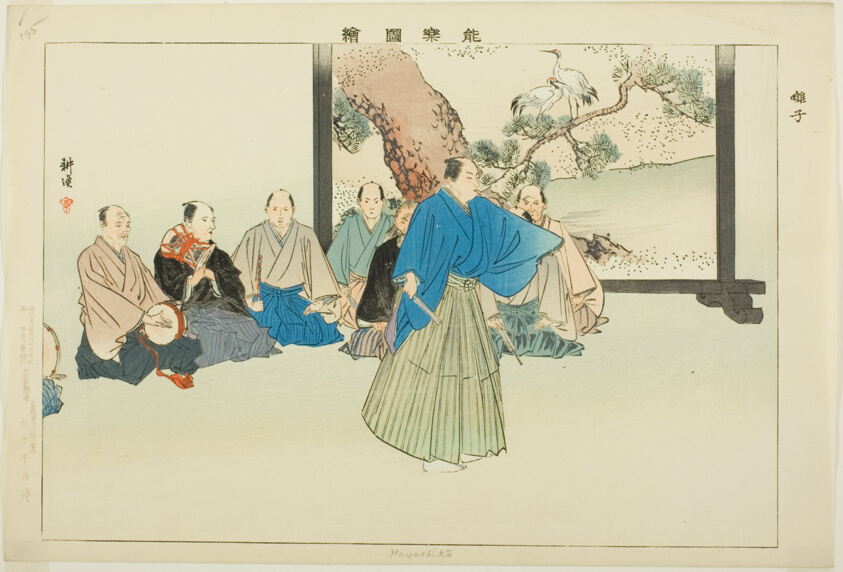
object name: Print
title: Hayashiko, from the series "Pictures of No Performances (Nogaku Zue)"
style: Japanese (culture or style)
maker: Tsukioka Kogyo; Japanese, 1869-1927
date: 1898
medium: Color woodblock print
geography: Japan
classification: woodblock print; print; asian art